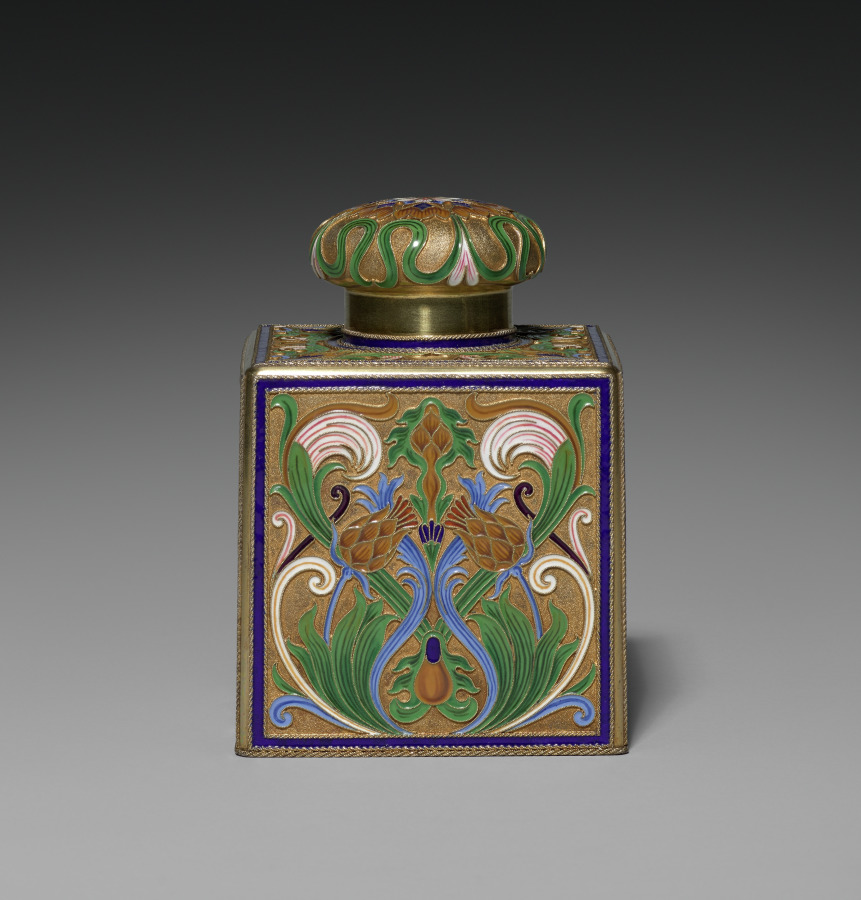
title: Covered Tea Caddy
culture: Russia, St. Petersburg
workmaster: attributed to Feodor Ivanovich Rückert (Russian, 1840–1917)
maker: House of Fabergé (Russian, 1842–1918)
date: 1896–1906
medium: silver gilt, opaque cloisonné enamel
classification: Miscellaneous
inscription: 88, Kokoshnik, tester's initials [assay mark for Moscow, 1899-1908]; C. Fabergé (in Cyrillic); double-headed eagle [imperial warrant]; 88.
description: Fabergé’s craftsmen in Moscow, especially under the watchful eye of workmaster Feodor Rückert, became known for their work in the pan-Slavic or neo-Russian style, hearkening back to 17th-century motifs of Russian folk art. Often on rather conventional shapes, Rückert and his silversmiths created an explosion of color, achieved through the historic technique of cloisonné enamel in which tiny metal lines are soldered to the surface then filled with glass powders in various colors and fired to create a high gloss finish. The result is a spectacular evocation of the 17th-century originals. Far from mere copies, however, Rückert's designs, such as this tea service, employ naturalistic or abstract motifs in a thoroughly modern adaptation of a remarkable earlier period of Russian art and decoration.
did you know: This covered tea caddy is part of a larger tea service.